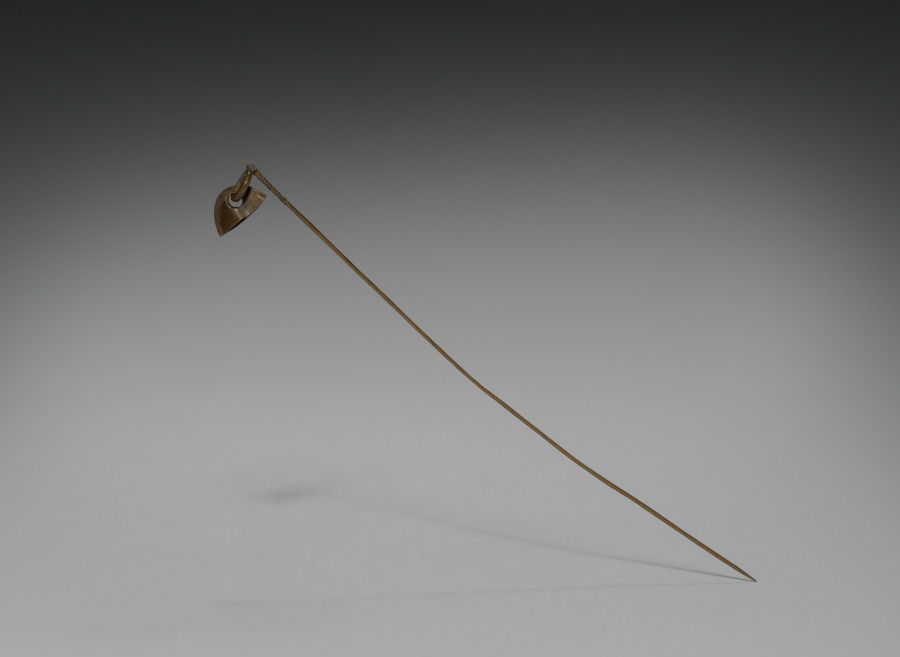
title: Pin for a Hat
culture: Africa, Central Africa, Democratic Republic of the Congo, Kuba-style maker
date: early 1900s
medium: Metal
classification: Garment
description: Titled Kuba men and prominent women wear the laket, a small ornate dome-shaped hat. An essential fashion item of adult men in good social standing, it focuses special attention on the head as a significant marker of individual identity, ethnic affiliation, status, and role in society. This prestige object is secured on the crown of the head with a large metal pin like this example that pierces through the hat onto a section of hair.